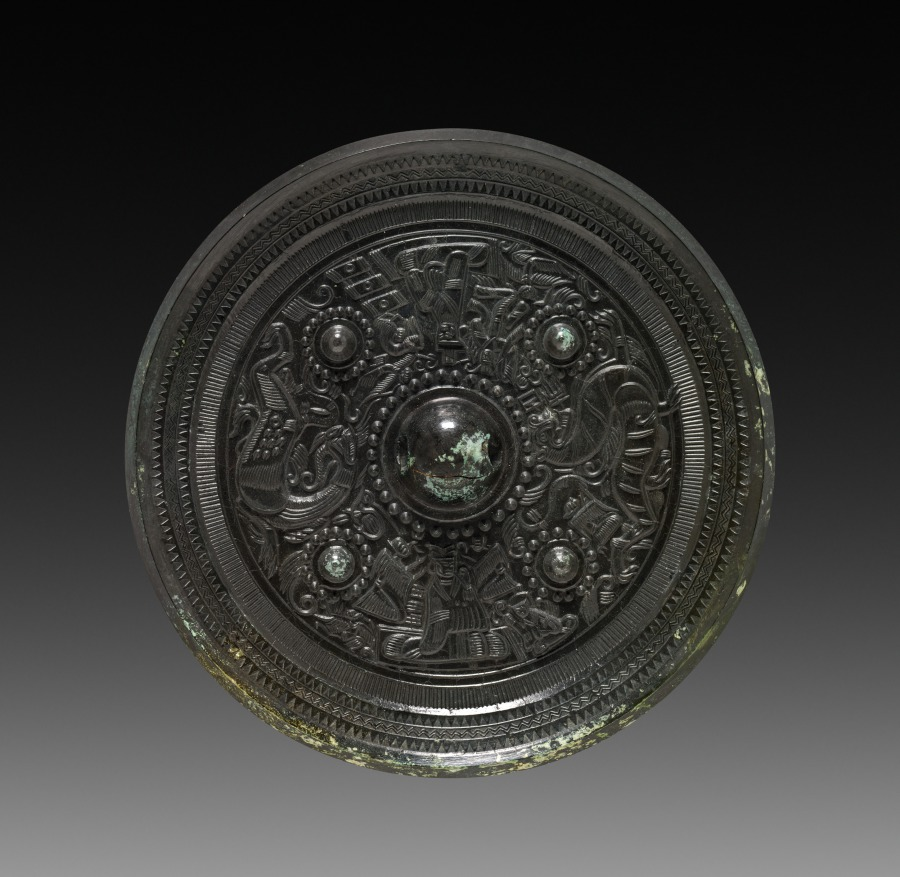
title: Mirror with Four Nipples, Immortals, Dragon and Tiger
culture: China, probably Zhejiang province, Eastern Han dynasty (25–220 CE)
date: c. 125–220 CE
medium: bronze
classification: Metalwork